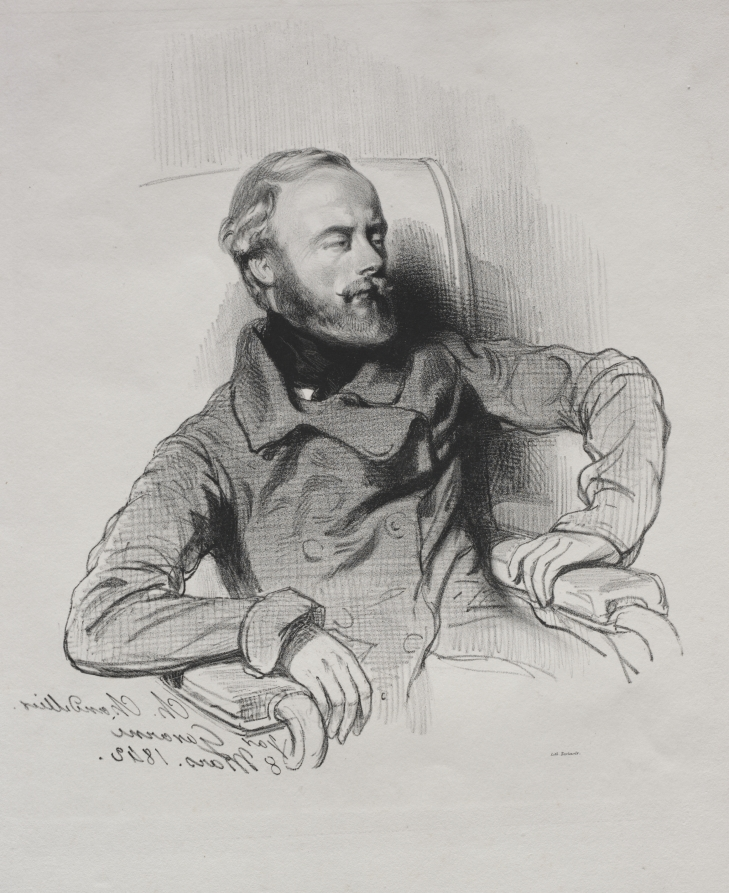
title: Ch. Chandellier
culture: France, 19th century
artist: Paul Gavarni (French, 1804–1866)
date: 1842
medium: lithograph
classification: Print